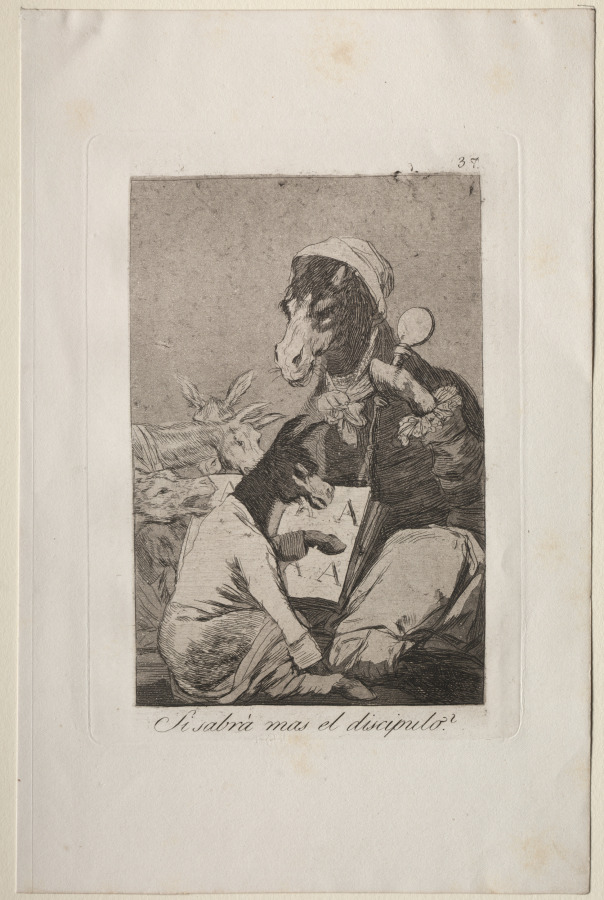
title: Might Not the Pupil Know More?, Plate 37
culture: Spain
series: Los Caprichos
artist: Francisco de Goya (Spanish, 1746–1828)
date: 1799, printed c. 1855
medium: etching and aquatint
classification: Print